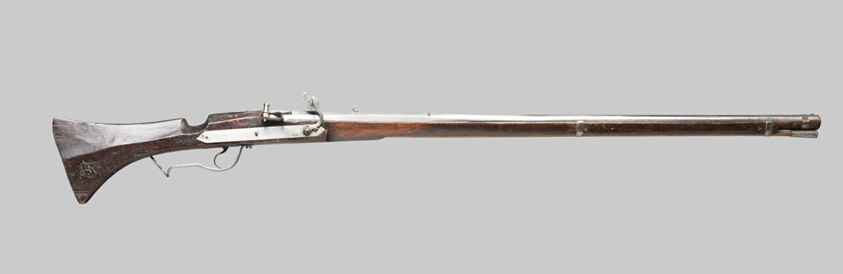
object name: Arms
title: Matchlock Musket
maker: German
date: c. 1600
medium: Wood (walnut) and steel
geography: Germany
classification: firearm-long gun; arms; arms and armor